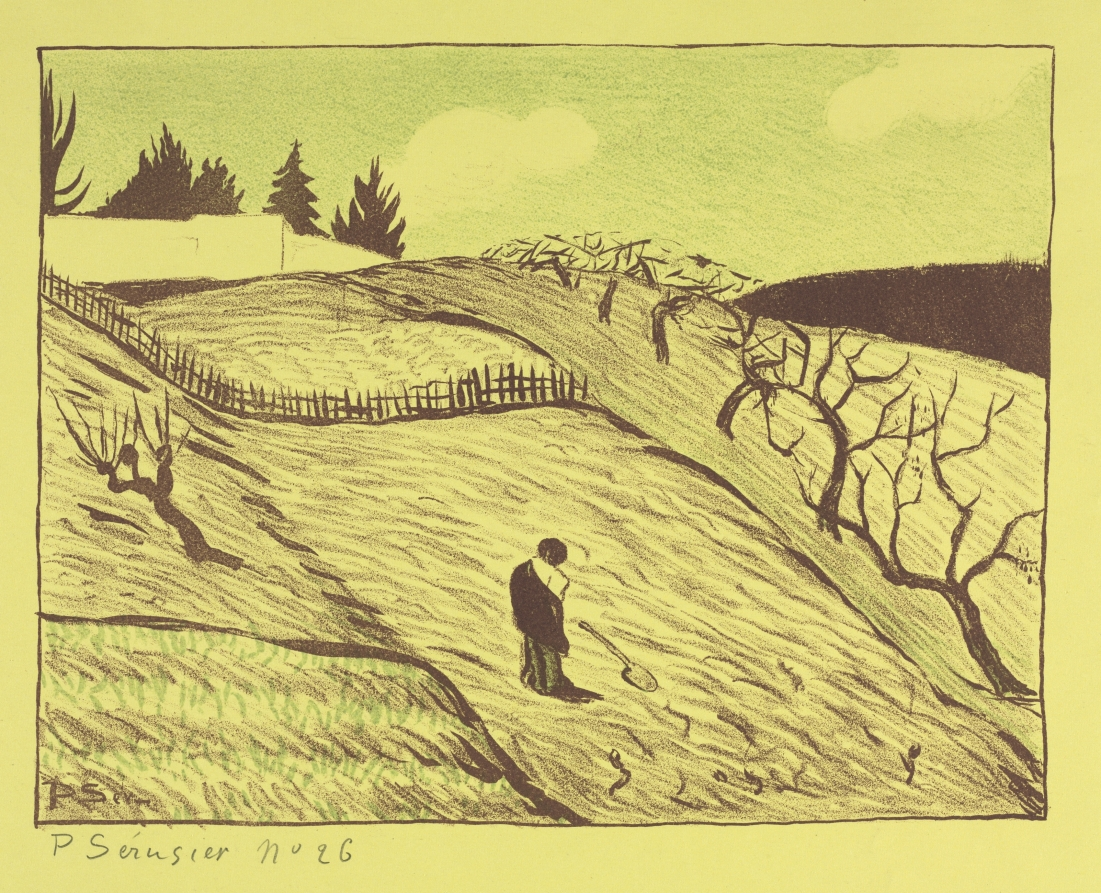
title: Landscape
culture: France, 19th century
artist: Louis Paul Henri Sérusier (French, 1864–1927)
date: 1893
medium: lithograph printed in green and brown on yellow paper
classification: Print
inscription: lower left, in graphite: P. Sérusier no 26; lower margin, in graphite: litho originale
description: Twenty-four-year-old Paul Sérusier met Paul Gauguin in Brittany at the artists' colony in Pont- Aven. Sérusier enthusiastically embraced the older artist's flat, simplified forms and bold colors. He became one of Gauguin's closest disciples, promoting his aesthetic among a group of Parisian artists who became known as the Nabis-the Hebrew word for "prophets"-because they predicted a new era in art. Sérusier was primarily interested in creating decorative surfaces which juxtaposed flat planes of opposing colors. Sérusier made only a few prints during his career, but the bold, primitive-looking Breton Landscape was selected for publication in L'estampe originale, a quarterly publication of original prints that appeared from 1893 to 1895. Breton Landscape pays homage to Gauguin's Volpini Suite, a series of eleven zincographs printed on canary yellow paper in 1889. The high horizon, tilted ground, winding fence, and geometric shapes of the fields echo details in Gauguin's Breton Women by a Fence.